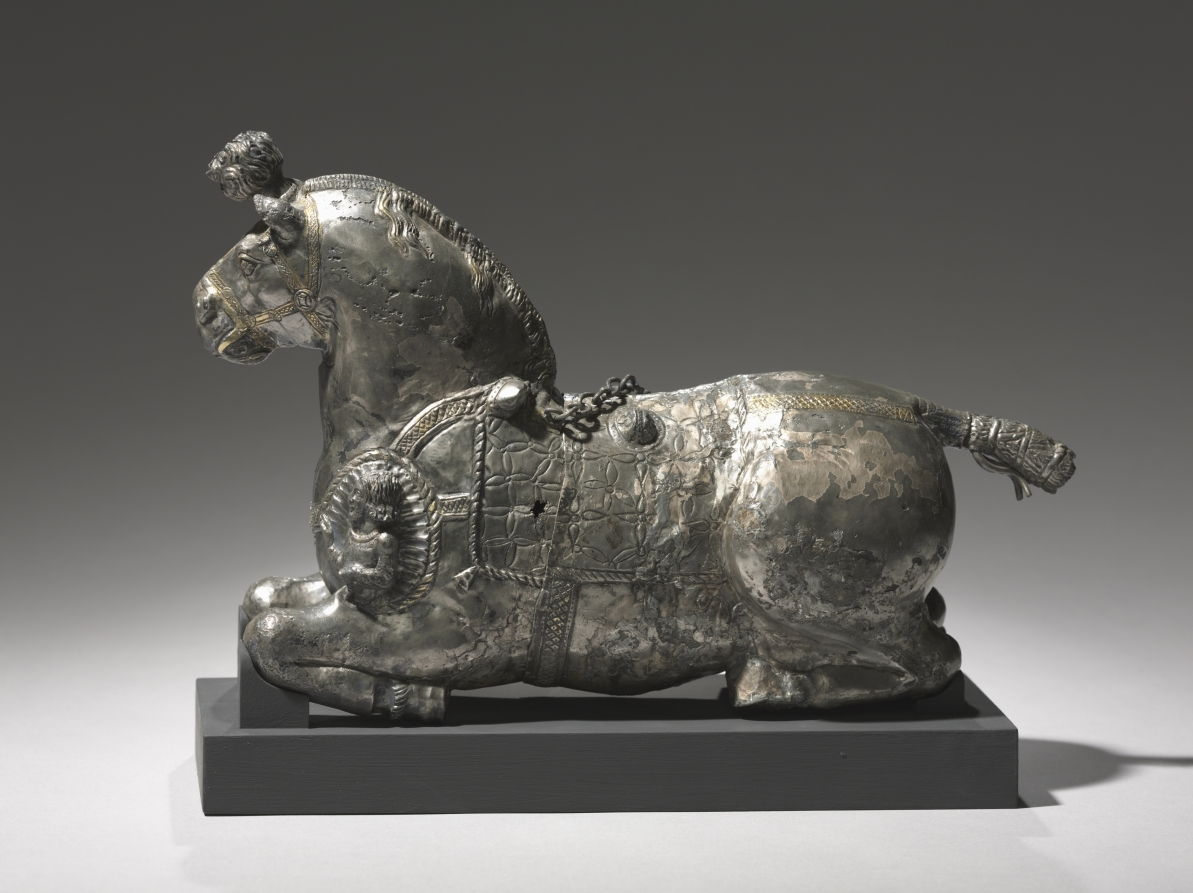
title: Horse-Shaped Drinking Vessel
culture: Iran, Sasanian Empire (224–651 CE)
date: 200–325 CE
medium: silver, partially gilt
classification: Metalwork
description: The horse was a favorite artistic subject in ancient Iran, where horse breeding flourished. This muscular Sasanian stallion was descended from the royal and sacred Nisean breed of the Achaemenian Persians. Although Sasanian horse trappings were elaborate, they did not include stirrups for mounting. In this rendition, the steed lies still, as camels in the Near East do today, waiting for its rider to mount. The medallions on each shoulder contain busts, perhaps of rulers of different parts of the Sasanian Empire, holding their rings of authority.